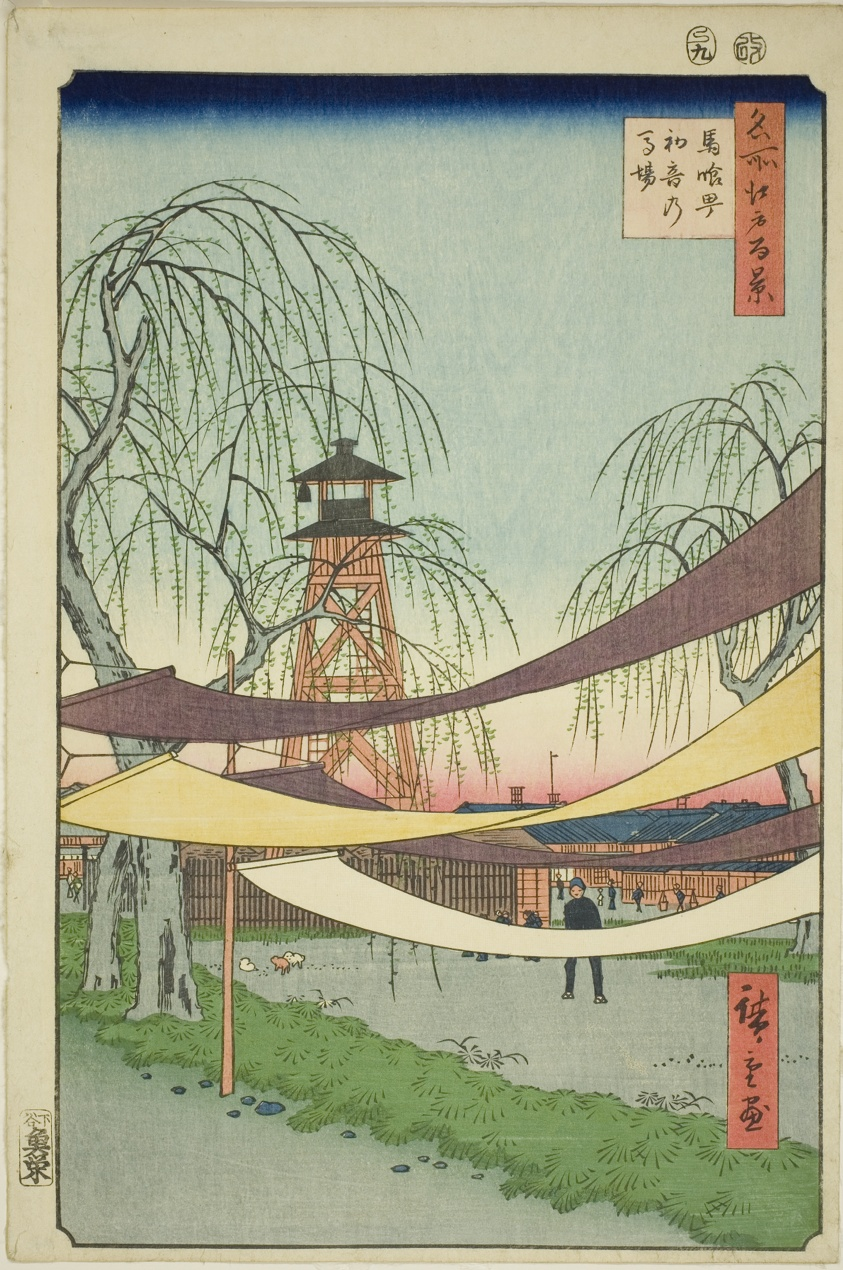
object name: Print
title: The Hatsune Riding Grounds at Bakuro-cho (Bakuro-cho Hatsune no Baba), from the series "One Hundred Famous Views of Edo (Meisho Edo hyakkei)"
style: Japanese (culture or style)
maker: Utagawa Hiroshige 歌川 広重; Japanese, 1797-1858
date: 1857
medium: Color woodblock print; oban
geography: Japan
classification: woodblock print; print; asian art